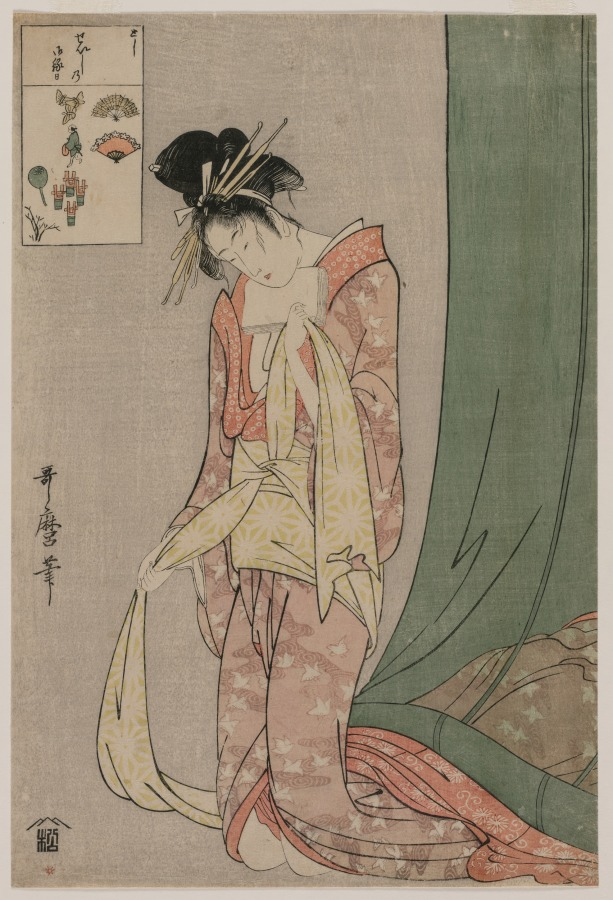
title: Hanaōgi of Ōgiya from the series Picture Puzzles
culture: Japan, Edo period (1615–1868)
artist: Kitagawa Utamaro (Japanese, c. 1754–1806)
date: c. 1797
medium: Color woodblock print; ink and color on paper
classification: Print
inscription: Signature: Utamaro hitsu. Publisher: Matsumuraya Yahei (emblem).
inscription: Collector's Seal: Vever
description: In this tricky print, one must decode the small pictures in the rectangle at the upper left corner to learn the identity of the subject of the print: a woman whose name means "Flower Fan," her place of work called the "House of Fans," and what she is doing—emerging from a mosquito net.